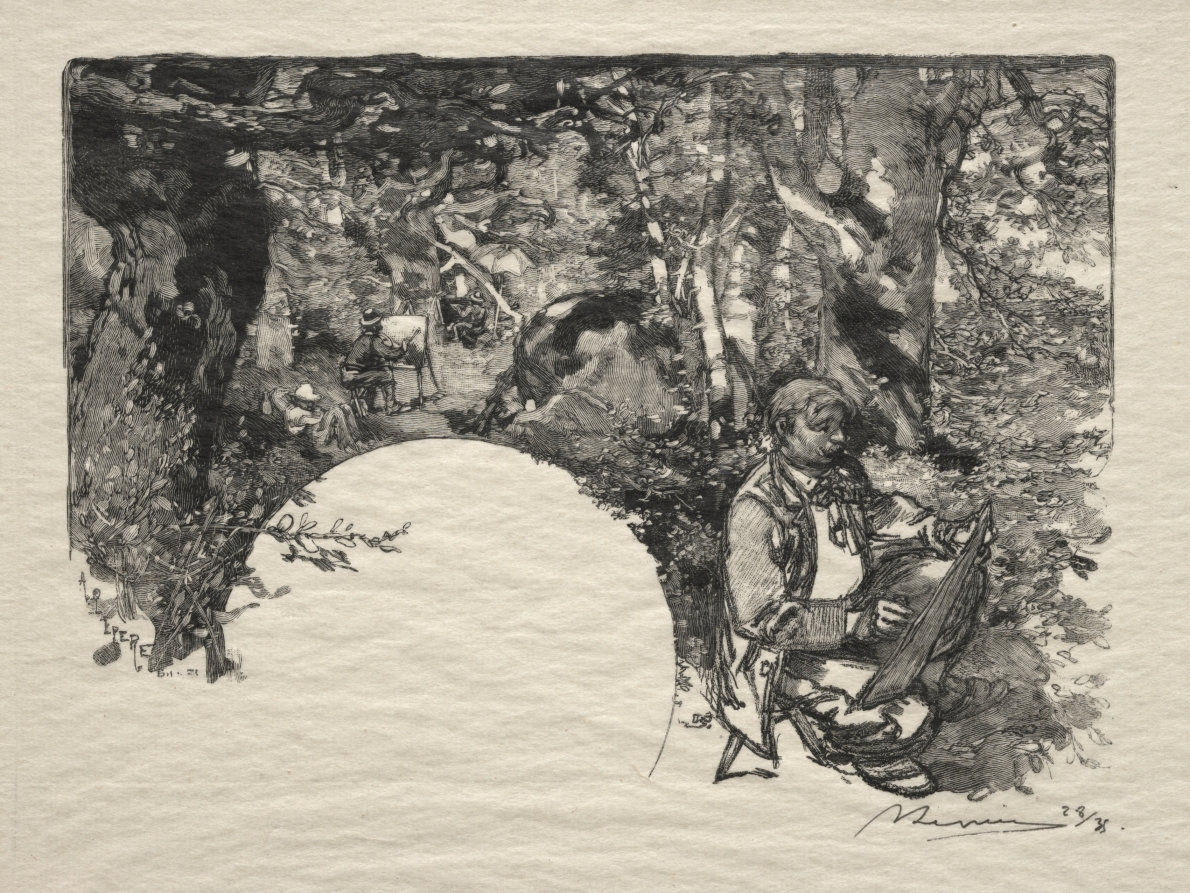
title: Le Peintres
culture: France, 19th century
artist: Auguste Louis Lepère (French, 1849–1918)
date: 1890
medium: wood engraving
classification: Print